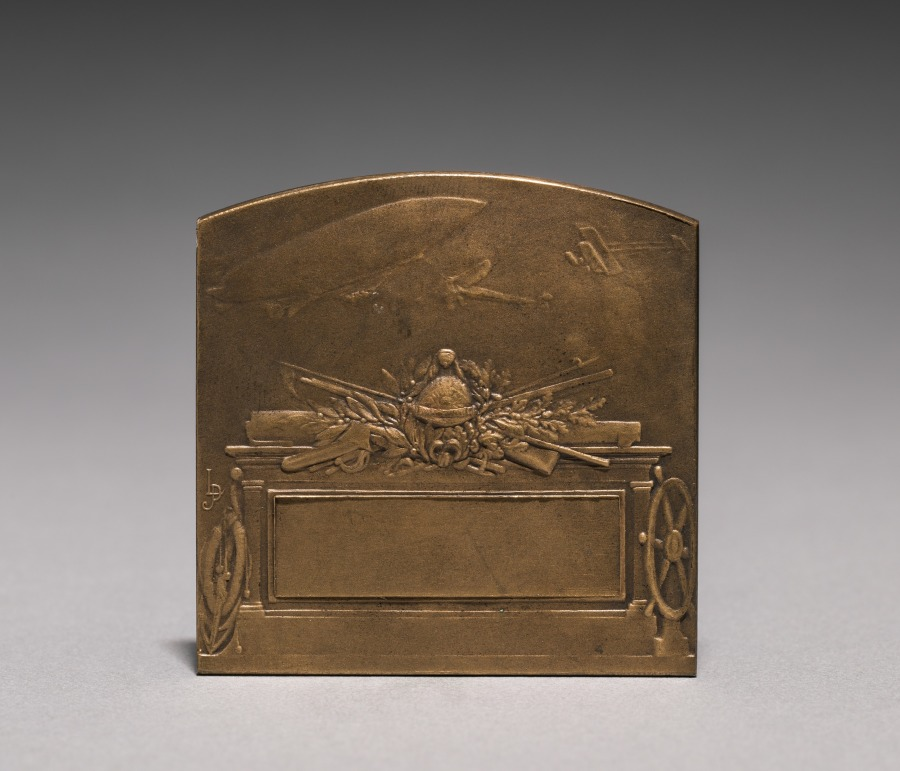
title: Medal (reverse)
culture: France, 19th century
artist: Jules Prosper Legastelois (French, 1855–1931)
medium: bronze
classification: Metalwork